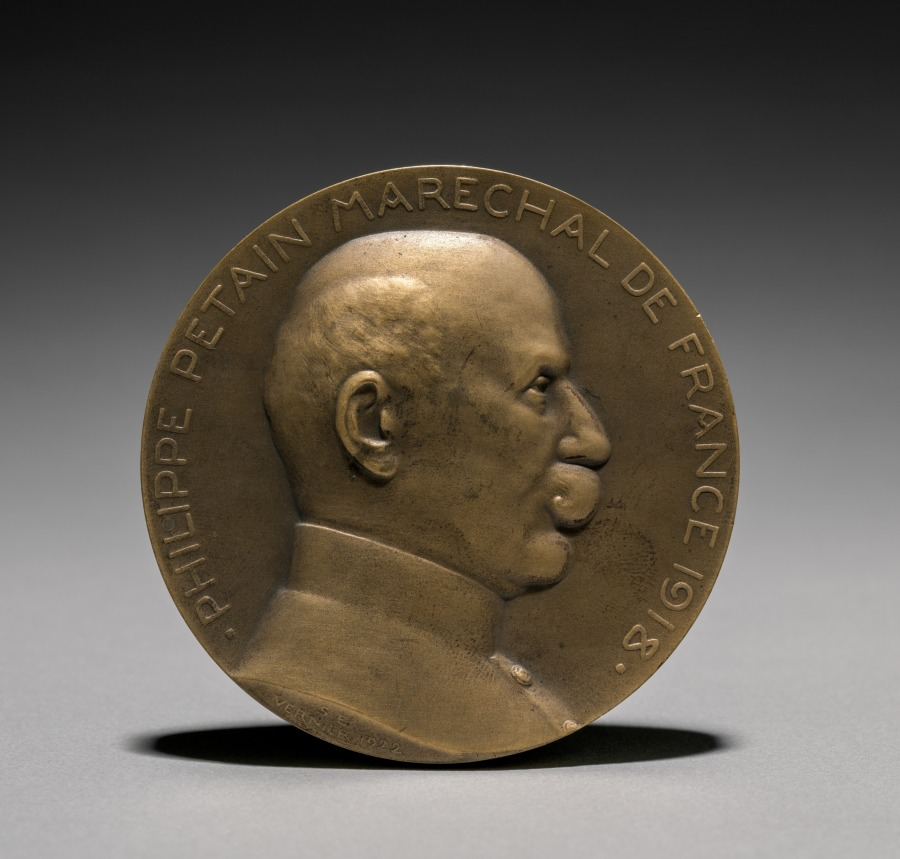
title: Petain Medal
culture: France, early 20th century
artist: Èmile Séraphin Vernier (French, 1852–1927)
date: 1922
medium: bronze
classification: Metalwork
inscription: obverse - "Philippe Petain Marechal de France, 1918." reverse - "AU MARECHAL PETAIN. ON LES AURA AVRIL 1916. ON LES A NOVEMBRE 1918."